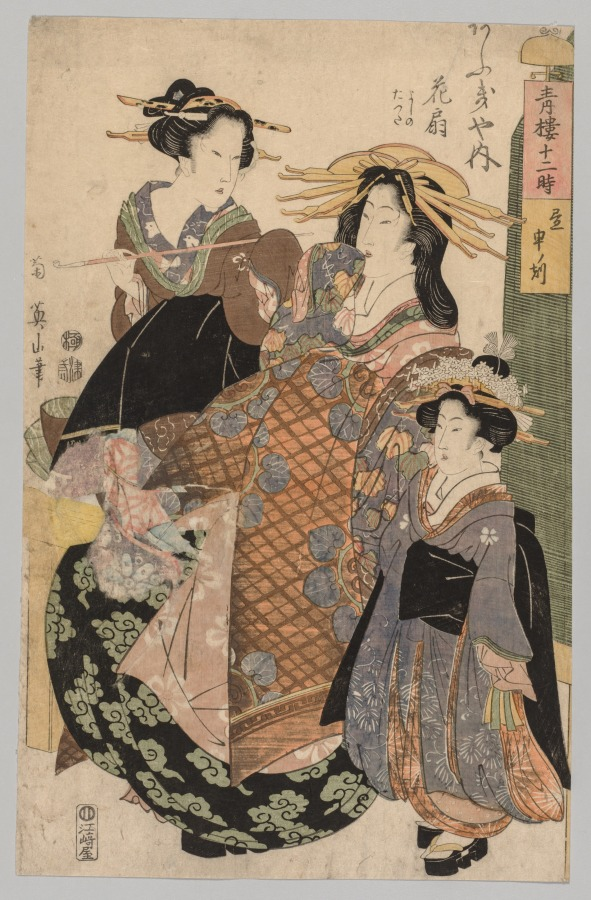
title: Two Women and a Girl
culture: Japan, Edo period (1615–1868)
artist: Kikukawa Eizan (Japanese, 1787–1867)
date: 1800–1829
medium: color woodblock print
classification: Print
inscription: Signature: Yeizan